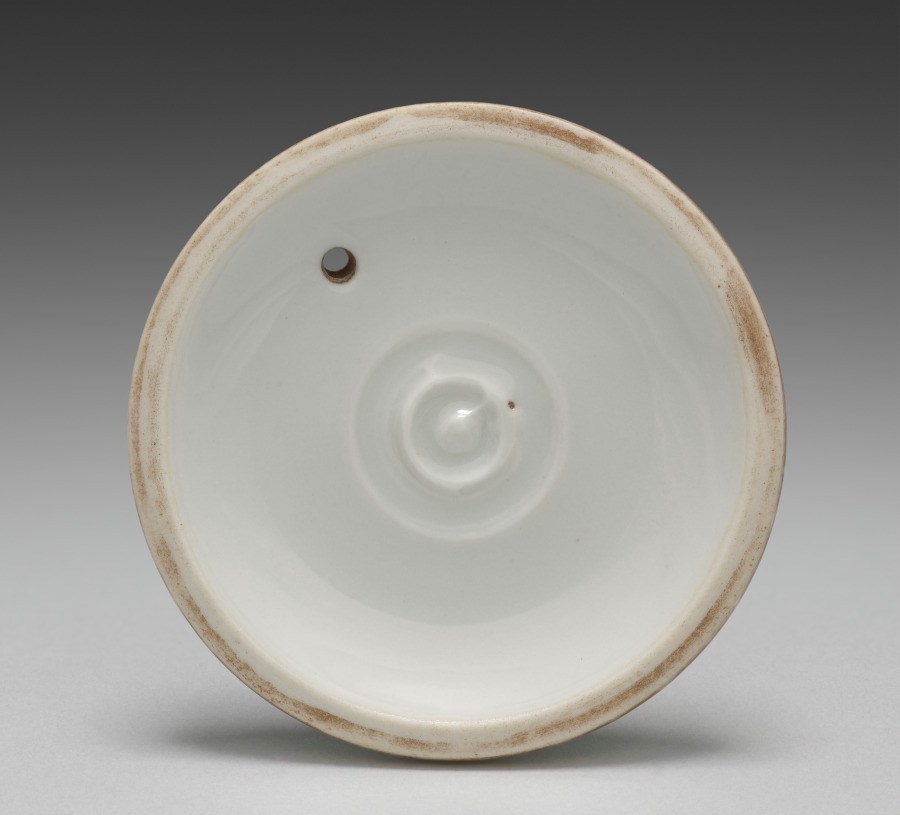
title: Lid for a Teapot with Chrysanthemum Motifs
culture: Japan, Meiji period (1868–1912)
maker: Seifū Yohei III (Japanese, 1851–1914)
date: 1912–14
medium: Porcelain with overglaze color enamel and gold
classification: Ceramic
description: This side-handled sencha teapot has the lid flush against the body, forming an oblong orb. It is decorated with a sprinkling of similar chrysanthemum motifs in red, green, and purple overglaze color enamels with centers of pale red dotted with gold.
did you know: This teapot with chrysanthemum motifs shows off Seifū Yohei III’s technique of enamels painted over the glaze.